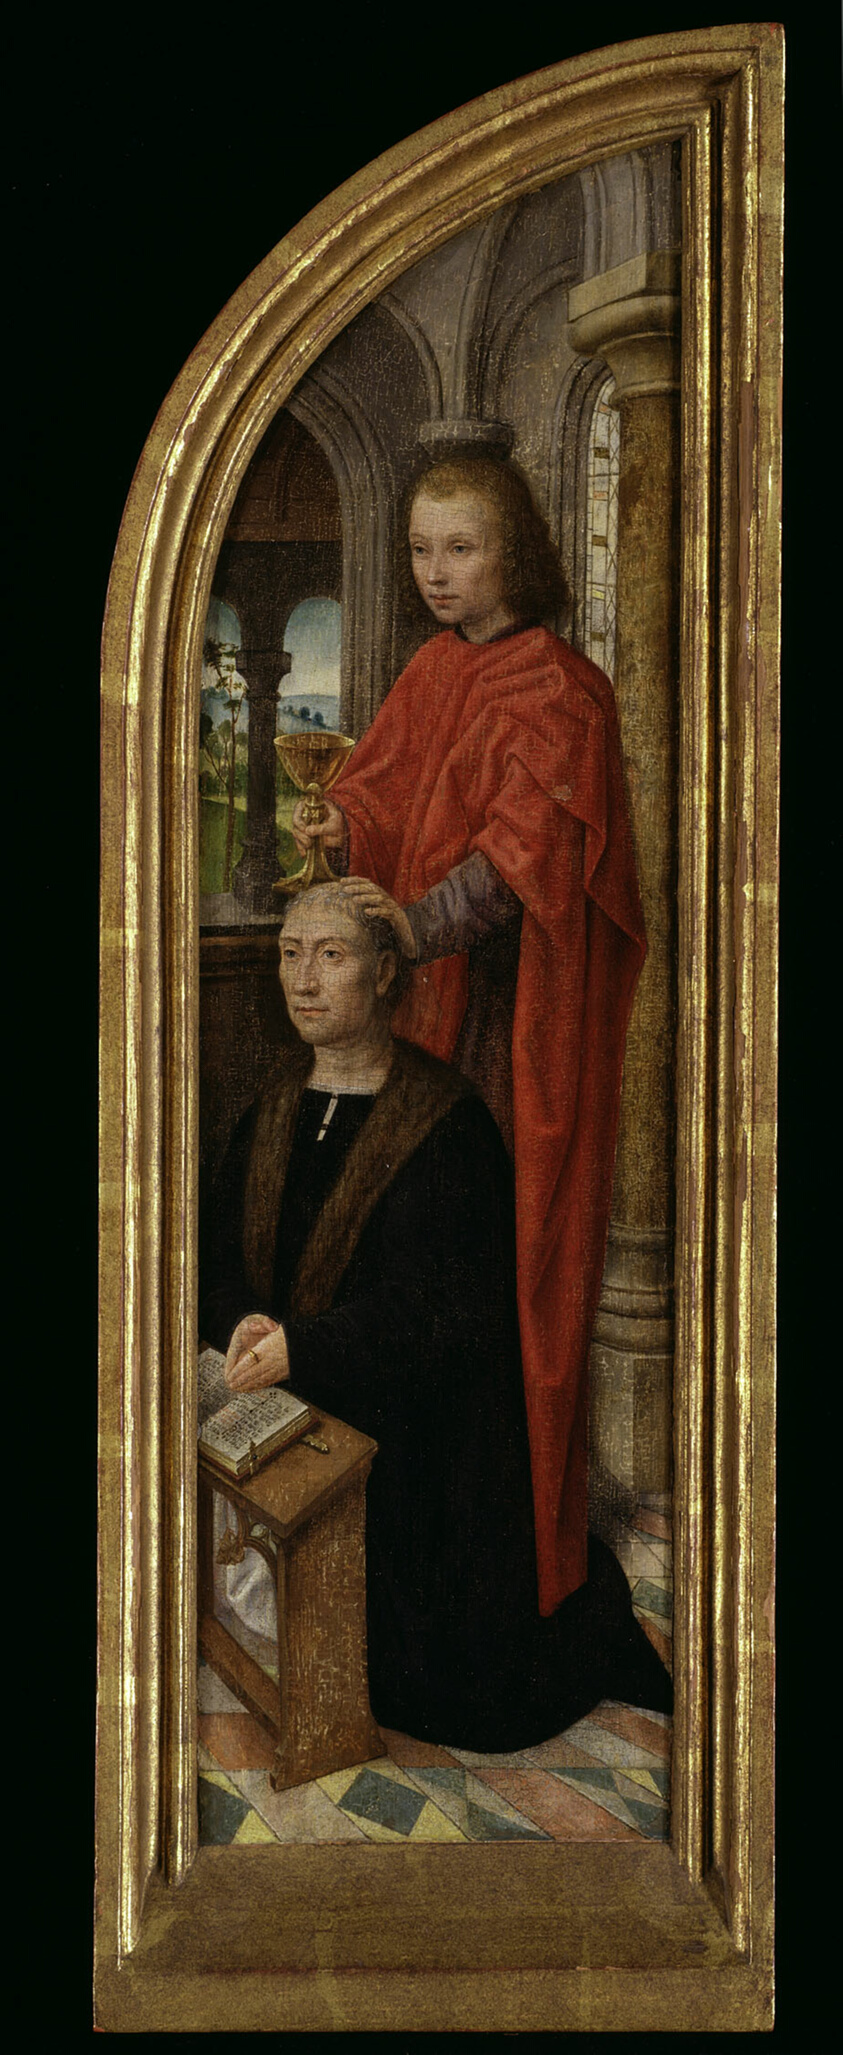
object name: Painting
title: Saint John the Evangelist and Donor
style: 15th century, Renaissance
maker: Master of the Morrison Triptych (Netherlandish, active c. 1500-1524)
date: c. 1490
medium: Oil on panel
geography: Belgium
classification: oil on panel; painting; triptych; paint; oil paintings (visual works); european painting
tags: saints, table, red (color), prayer, landscape, hills, chalice, bibles, windows, window, Tile, religious figures, religious attire, religious, religion, men, interior, Devotion, Christianity, Christian subjects, architecture, architecture, architechture